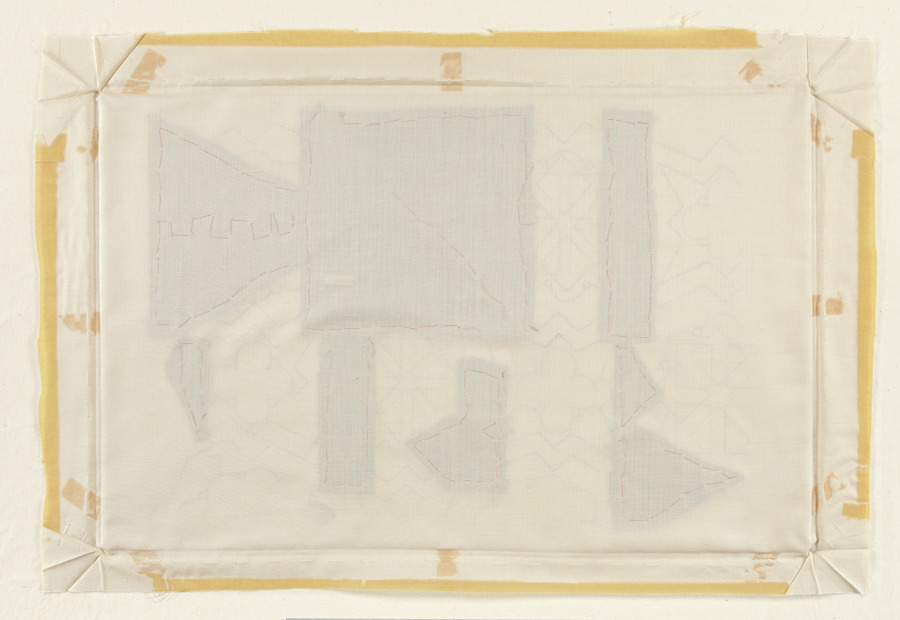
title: Fragment of Silk Brocade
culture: Spain, Islamic period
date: 14th-16th century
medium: lampas weave, silk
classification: Textile